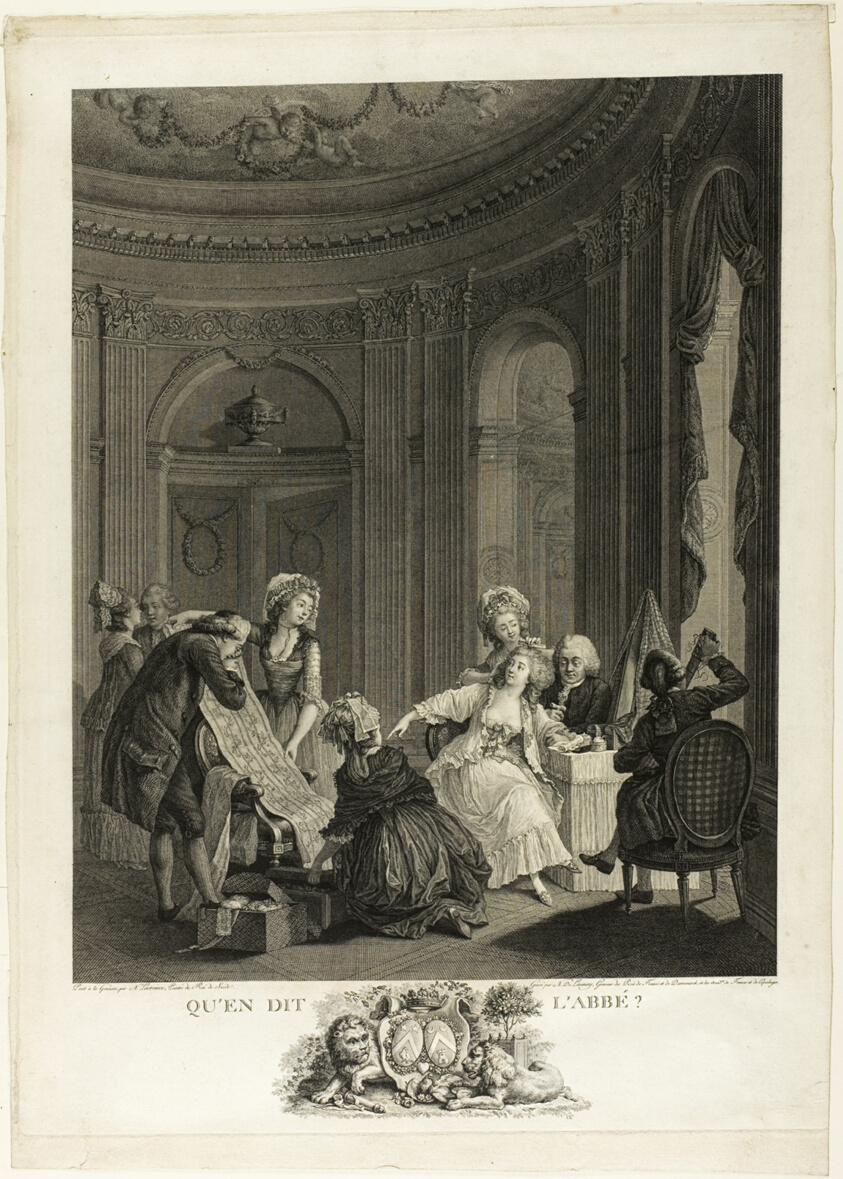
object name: Print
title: What Does the Abbot Say About It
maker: Nicolas Delaunay (French, 1739-1792); after Nicolas Lavreince (Swedish, 1737-1807)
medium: Engraving in black ink on ivory wove paper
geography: France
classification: engraving; print; prints and drawing